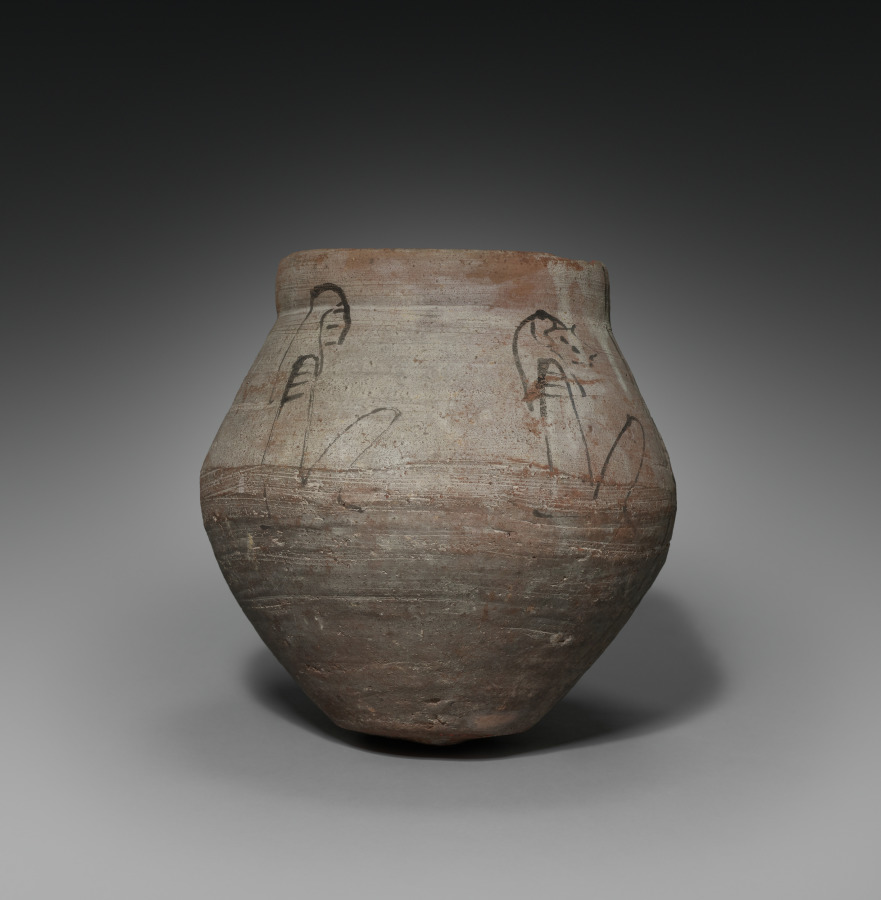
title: Shawabty Jar with Lid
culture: Egypt, New Kingdom (1540–1069 BCE), Dynasties 19–20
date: 1295–1069 BCE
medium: Nile silt ware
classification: Funerary Equipment